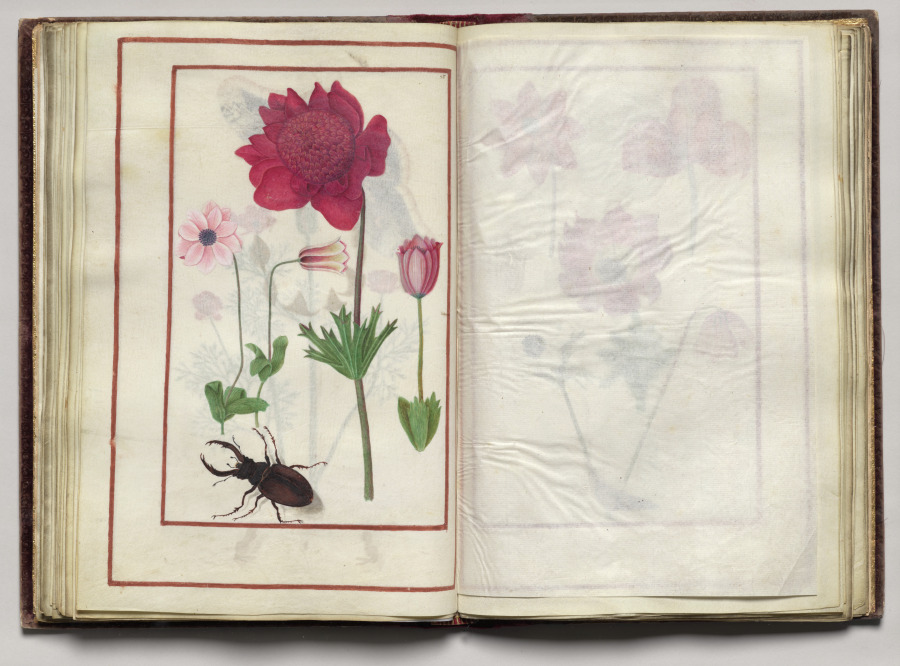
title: Red Anemones? with Stag Beetle, folio 29 (verso), from Florilegium (A Book of Flower Studies)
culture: France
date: 1608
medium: watercolor, ink, silver, and gold over occasional traces of pencil, on vellum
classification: Bound Volume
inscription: Dated: Poitiers 1608 (on frontispiece) Signed: On frontispiece in black ink, lower right: Van Kuyk Notation on drawing: Frontispiece: in pencil, lower margin: * élève de Van Kessel, peintre flammand (* in pencil also appears in front of Van Kuyk's name).